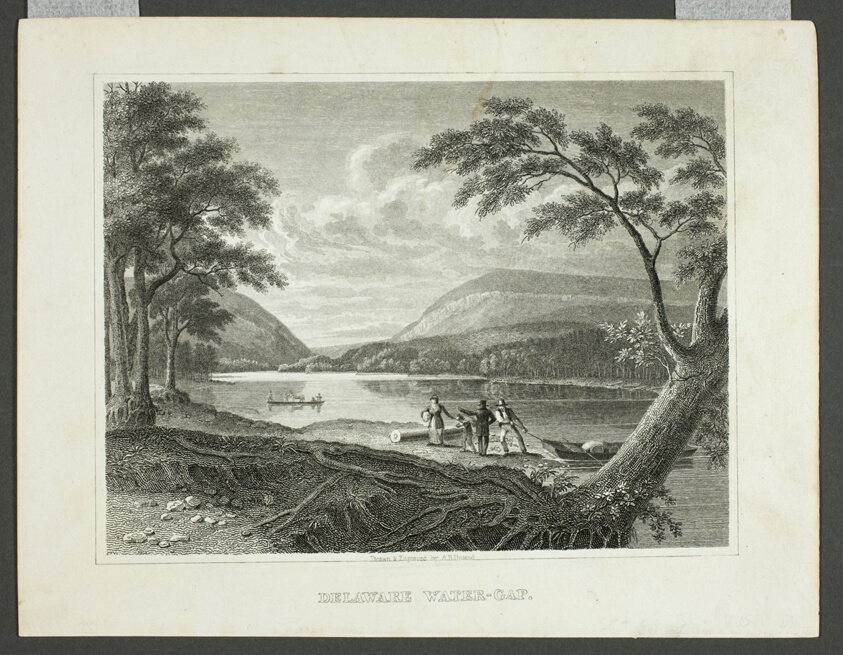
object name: Print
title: Delaware Water Gap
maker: Asher B. Durand; American, 1796-1886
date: 1830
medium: Engraving on off-white wove paper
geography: United States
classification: wood engraving; print; prints and drawing